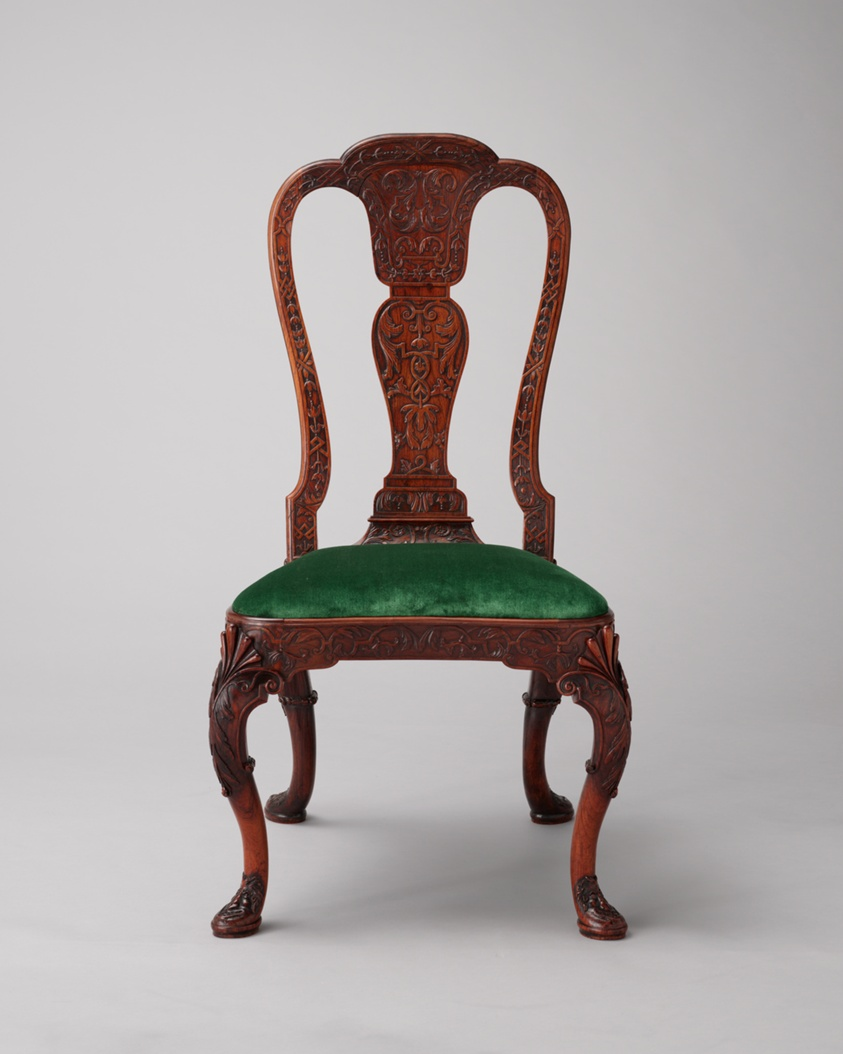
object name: Furniture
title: Chair (one of a pair)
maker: Chinese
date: c. 1730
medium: Padauk wood with textile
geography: China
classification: furniture; chair; european decorative arts